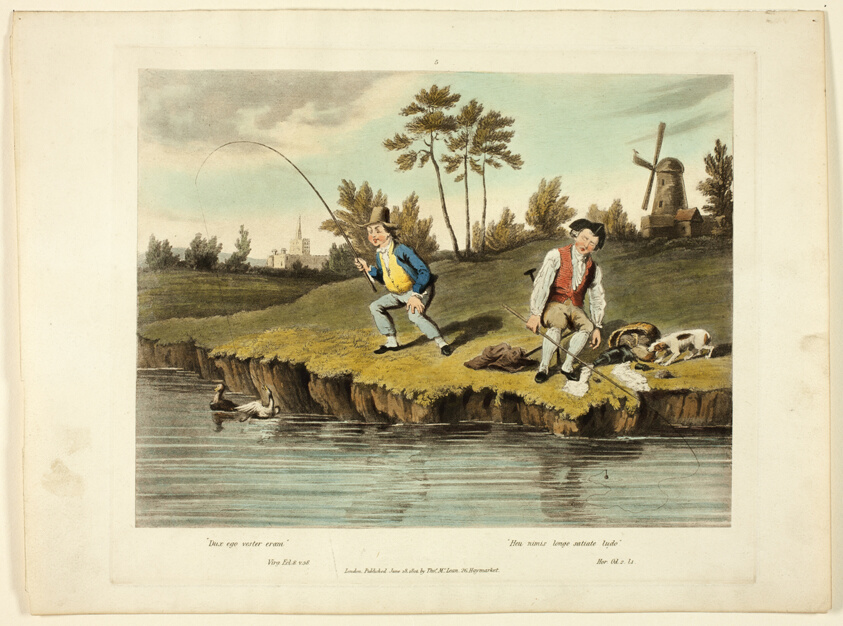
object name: Print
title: Delights of Fishing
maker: Charles Turner (English, 1773-1857); after Sir Robert Frankland (English, 1784-1849); published by Thomas McLean (English, active c. 1790-1860)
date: 1823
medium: Hand-colored etching and aquatint on ivory wove paper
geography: England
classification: aquatint; print; prints and drawing